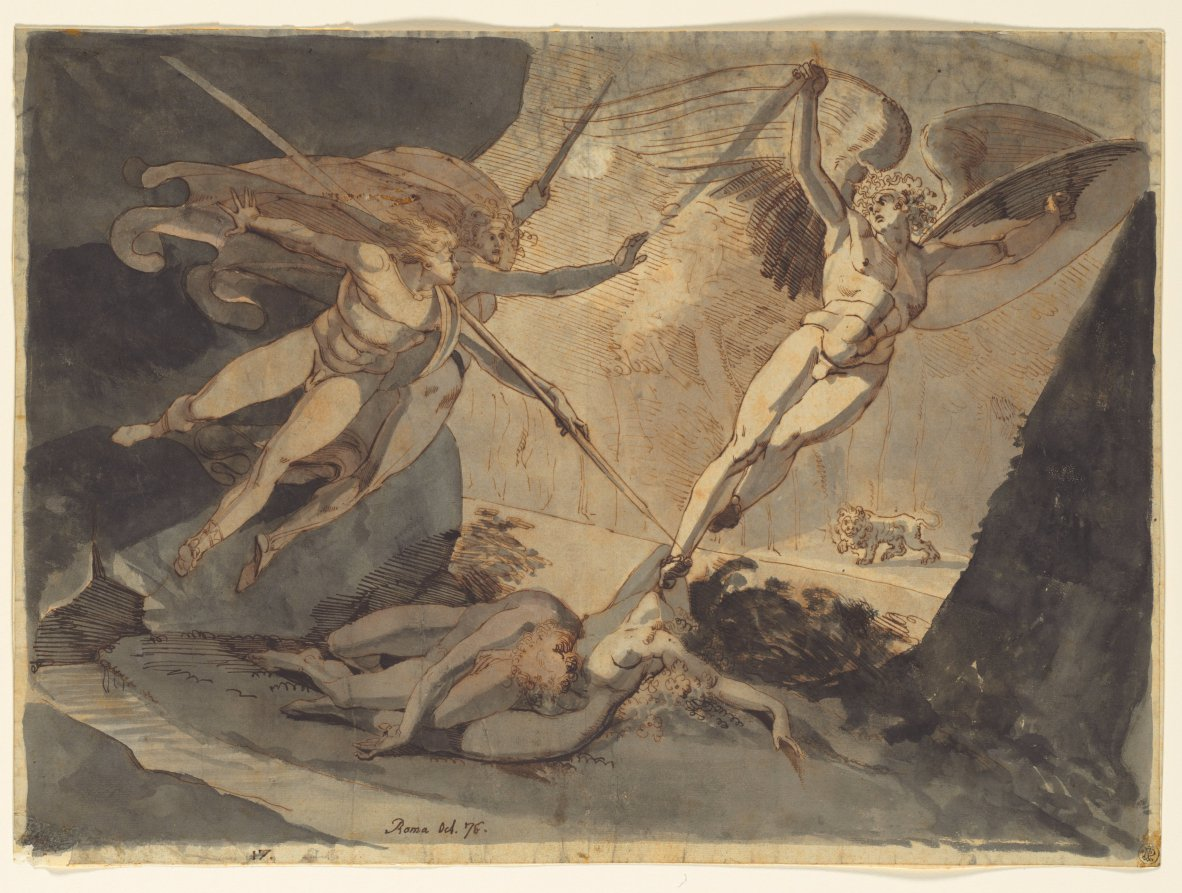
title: Satan Starts from the Touch of Ithuriel's Spear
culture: England, 18th century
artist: Henry Fuseli (Swiss, 1741–1825)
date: 1776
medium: pen and brown ink and brush and gray wash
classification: Drawing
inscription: inscribed, at lower center, in brown ink: Roma Oct. 76; at lower left, in brown ink: 17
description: Henry Fuseli's lifelong interest in the work of the English poet John Milton (1608-1674) inspired many drawings that interpreted passages from Milton's epic poem Paradise Lost (1667). This early example illustrates the moment when the angels Ithuriel and Zephon discover Satan disguised as a toad in the bower where Adam and Eve are sleeping. Ithuriel forces Satan to reveal himself by prodding him with a spear. The lion in the background alludes to an earlier passage in the poem, when Satan takes on the shape of the beast in order to spy on the couple.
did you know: This drawing is one of three almost identical drawings depicting the same scene from Paradise Lost; the other sheets are in the collections of the National Gallery, Stockholm, and the British Museum, London.